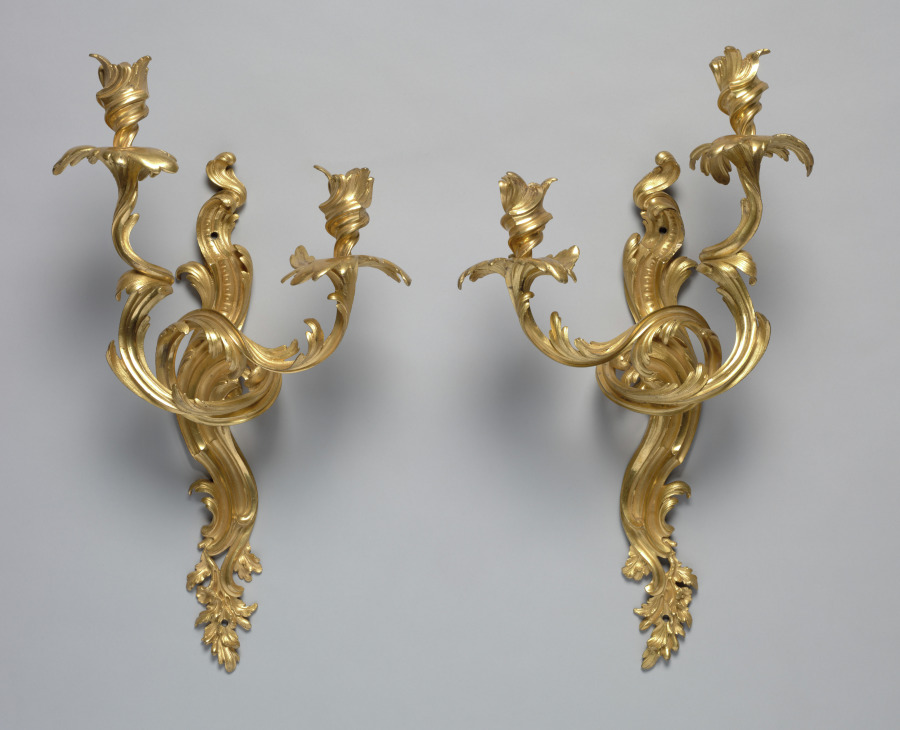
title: Candle Bracket Pair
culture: France, 18th century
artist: attributed to Jean Joseph de Saint-Germain (French, 1720–1791)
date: c. 1750–1760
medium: gilt bronze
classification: Furniture and woodwork